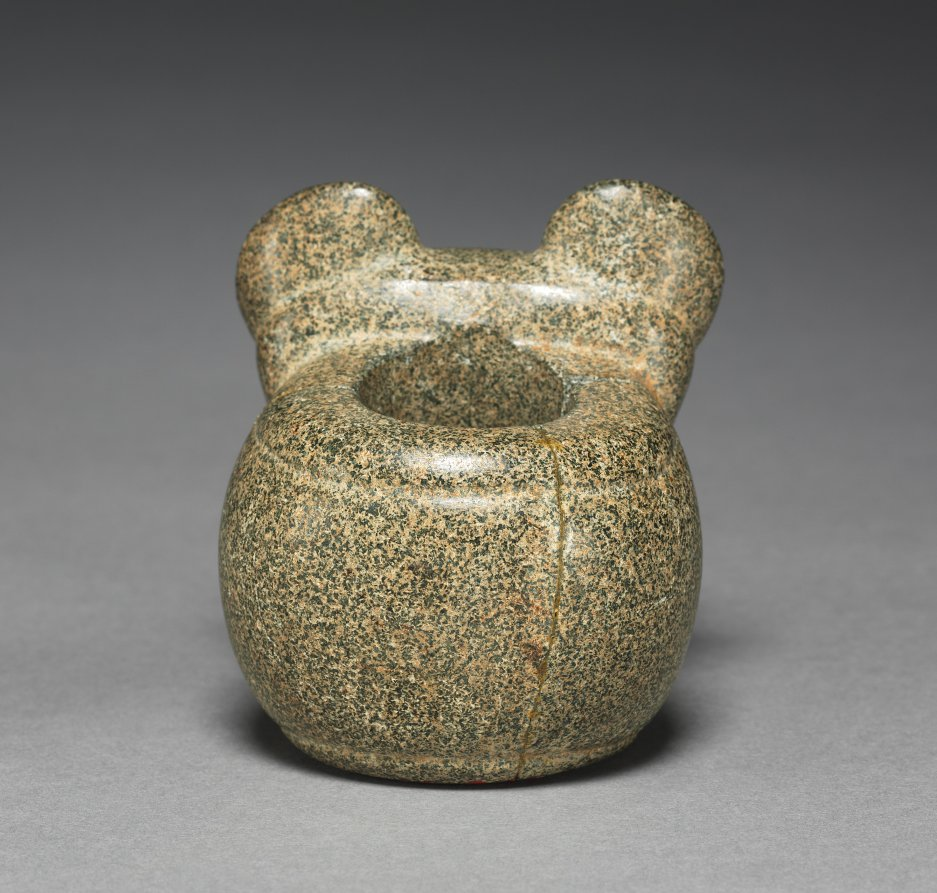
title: Ceremonial Mace (Club) Head: Feline (Jaguar?)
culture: Costa Rica, Southern Nicoya region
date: c. 300 BCE–600 CE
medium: stone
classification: Stone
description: Probably once mounted on wooden shafts, these objects could have served as symbols of chiefly authority, group insignia, the heads of ceremonial weapons, or all three. They eventually were placed in elite graves. The bird may be a male curassow and the feline, a jaguar.